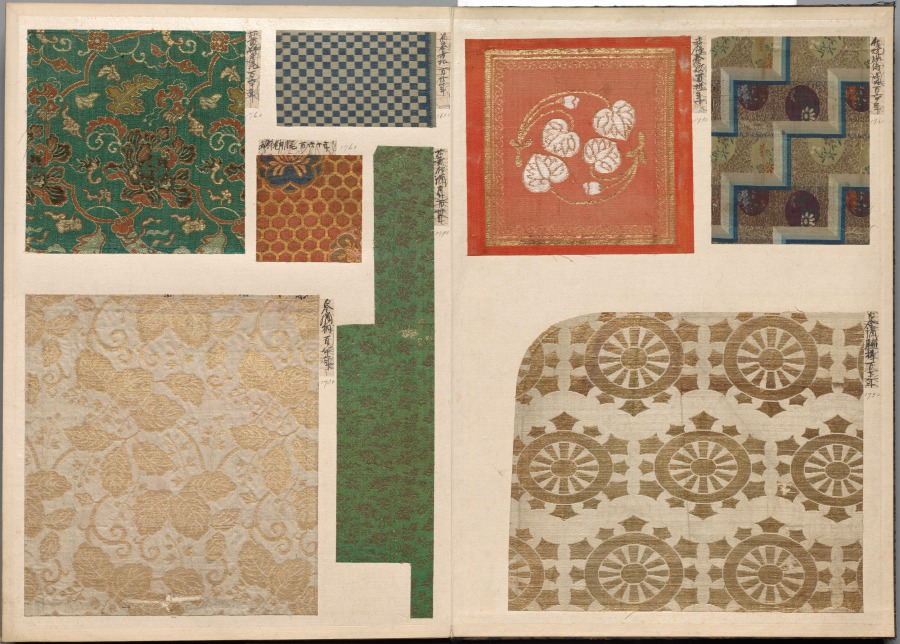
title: Album of Textile Samples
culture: Japan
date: 1790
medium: silk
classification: Textile